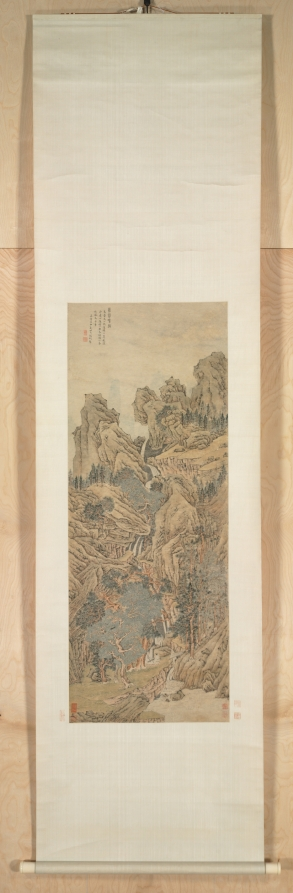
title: Playing the Qin in a Secluded Valley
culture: China, Ming dynasty (1368–1644)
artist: imitator of Wen Zhengming (Chinese, 1470–1559)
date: 1548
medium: hanging scroll; ink and light color on paper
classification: Painting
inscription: 幽壑鳴琴。 萬疊高山供道眼，千尋飛瀑淨塵心。 憑將一曲朱絃琴，小答松風太古音。 嘉慶戊申夏四月徵明製 [印] 徵明; 徵仲父印 [右下方] 悟言室印; 衡山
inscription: 4 additional seals: 3 of Cheng Qi 程琦 (1911–1988); 1 unidentified.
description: The poem inscribed in this painting reads: "Ten thousand layered lofty mountains are presented to the cultivated eye, A thousand feet of cascading falls cleanse the dusty heart. May the harmonies of my red-stringed tune Be the humble answer to the pine wind's ancient song." Different versions of this painting exist. Scholars have suggested that the solid renderings of the rock masses and the volumetric mountain configurations as seen here appear more characteristic of Lu Zhi 陸治 (1496–1576), Wen Zhengming's pupil.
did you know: In paintings, Chinese literati often play the instrument in a landscape setting, as the sound of the qin symbolizes harmony between man and nature.